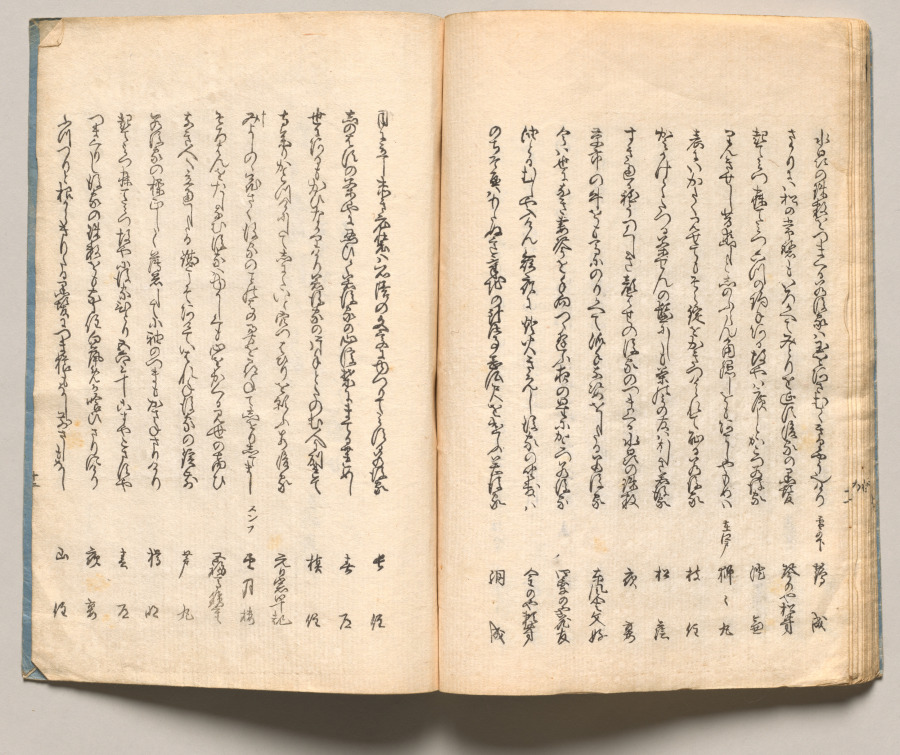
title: Spread Twenty from Volume One of People of Japan in Light Verse (Kyōka)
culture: Japan, Edo period (1615–1868)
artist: Utagawa Hiroshige (Japanese, 1797–1858)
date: 1857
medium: Woodblock-printed book; ink and color on paper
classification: Bound Volume